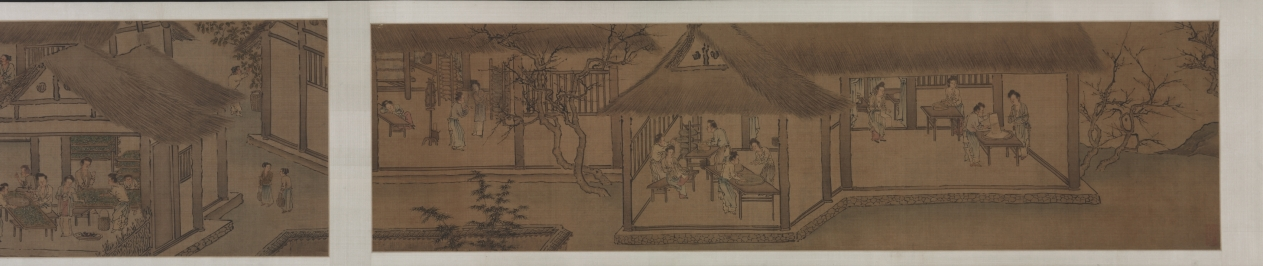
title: Sericulture (The Process of Making Silk)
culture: China, Southern Song dynasty (1127-1279)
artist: attributed to Liang Kai (Chinese, mid-1100s–early 1200s)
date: early 1200s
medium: Handscroll; ink and color on silk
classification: Painting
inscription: 3 colophons and 7 seals of Ch'eng Ch'i (20th c.).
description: By the Southern Song period, the economic center of the silk industry had shifted to the lower Yangzi delta, while the north continued to be troubled by wars. Divided into three sections, the handscroll illustrates 14 steps in the process of making silk, from the raising of silkworms to the weaving of silk cloth. The scroll’s scenes follow the illustrations of Lou Shou’s (1090–1162) Pictures of Tilling and Weaving (gengzhi tu), the first recorded painting of this genre, which was conceived in Hangzhou around 1145. However, in the Cleveland painting the artist groups several scenes of sericulture together under the roof of an open structure.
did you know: The painting is attributed to Liang Kai, a court artist active from about 1201 to 1204 at the Imperial Painting Academy in the city of Hangzhou, a major silk weaving center from that time to the present day.